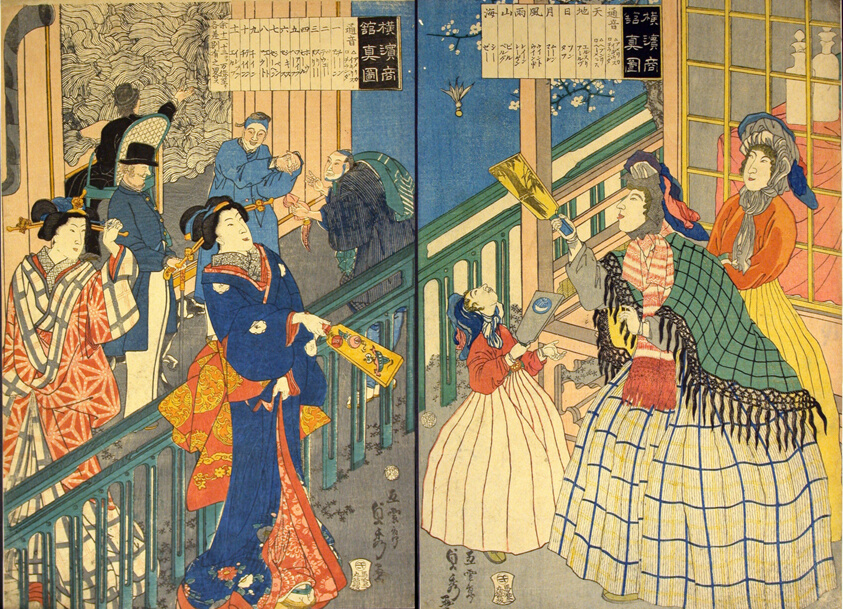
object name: Print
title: True View of a Yokohama Mercantile House (Yokohama shokan shinzu)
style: Japanese (culture or style)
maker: Utagawa Sadahide (Japanese, 1807-1873)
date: 1861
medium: Color woodblock print; oban diptych (part of a triptych)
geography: Japan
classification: woodblock print; print; asian art